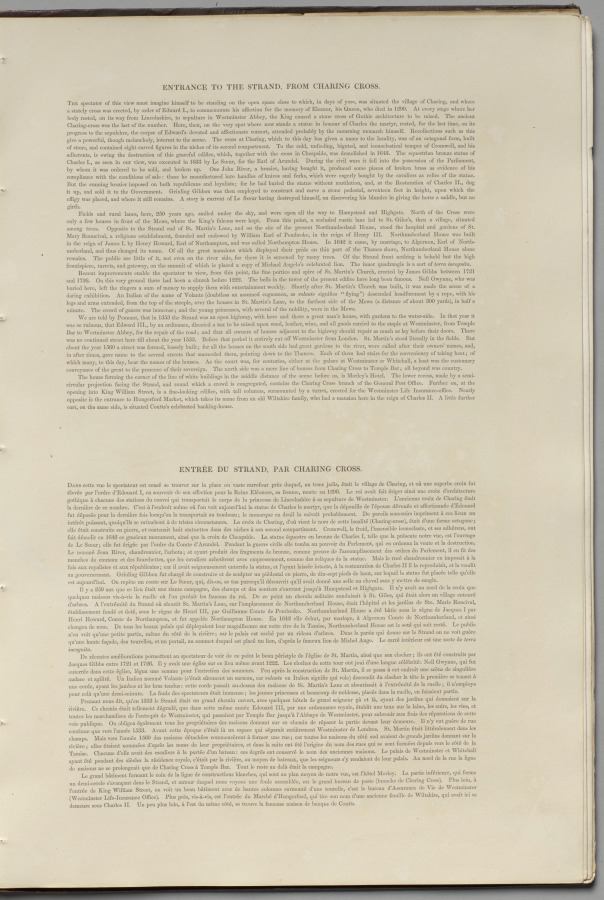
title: London As It Is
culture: England, 19th century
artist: Thomas Shotter Boys (British, 1803–1874)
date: 1842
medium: lithograph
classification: Bound Volume